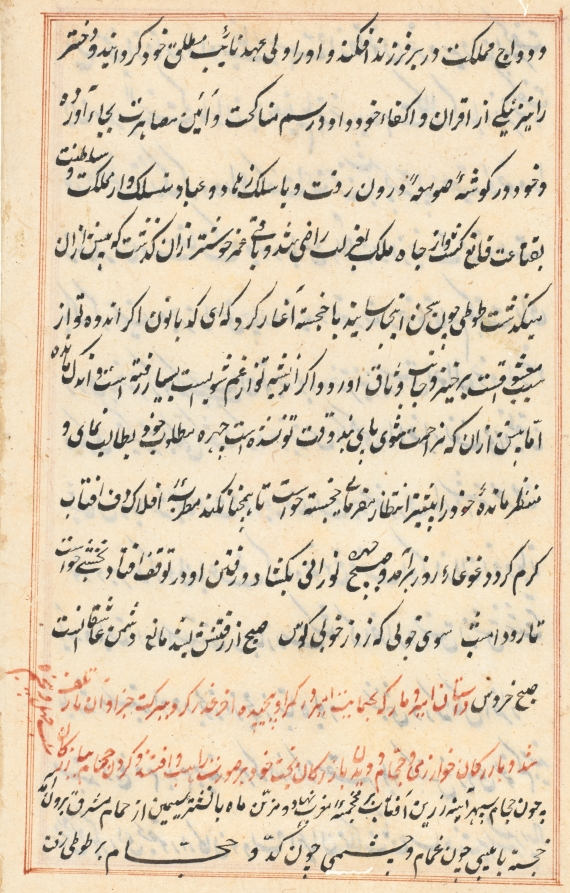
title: Page from Tales of a Parrot (Tuti-nama): text page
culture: Mughal India, court of Akbar (reigned 1556–1605)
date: c. 1560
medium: gum tempera, ink, and gold on paper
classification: Painting